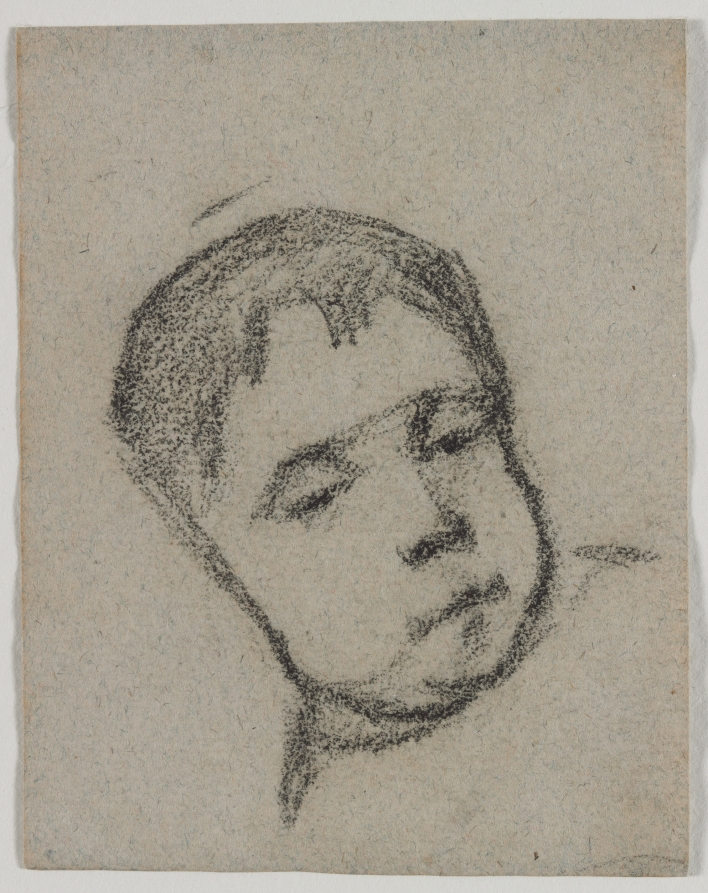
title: Emil Gauguin as a Child, Head on a Pillow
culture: France, 19th century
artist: Paul Gauguin (French, 1848–1903)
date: c. 1875–1876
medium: black crayon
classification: Drawing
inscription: VERSO, upper center, in graphite [?]: [illegible]stre